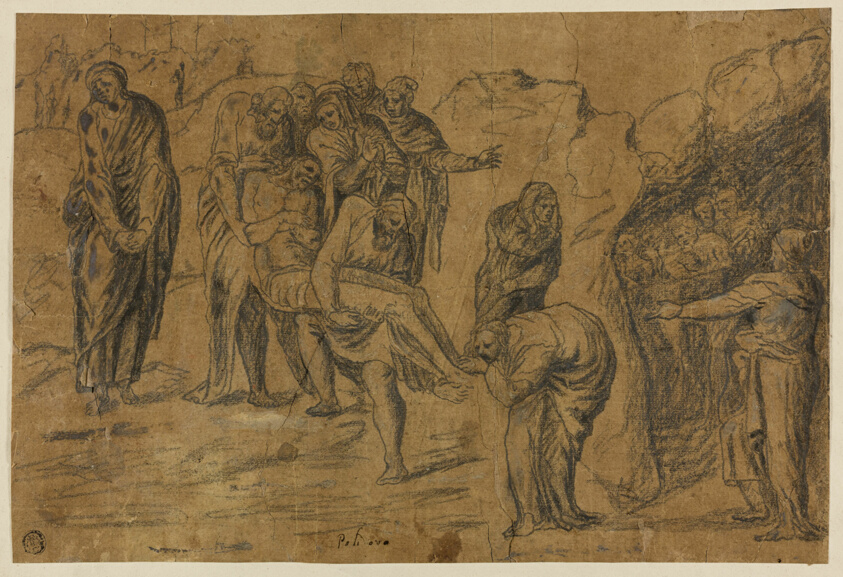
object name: Drawing and Watercolor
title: Entombment of Christ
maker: After Polidoro Caldara, called Polidoro da Caravaggio; Italian, c. 1499-c. 1543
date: 1527/28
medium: Charcoal, with traces of white gouache, on brown laid paper, laid down on brown laid paper and cream wove paper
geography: Italy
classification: charcoal; drawings (visual works); prints and drawing